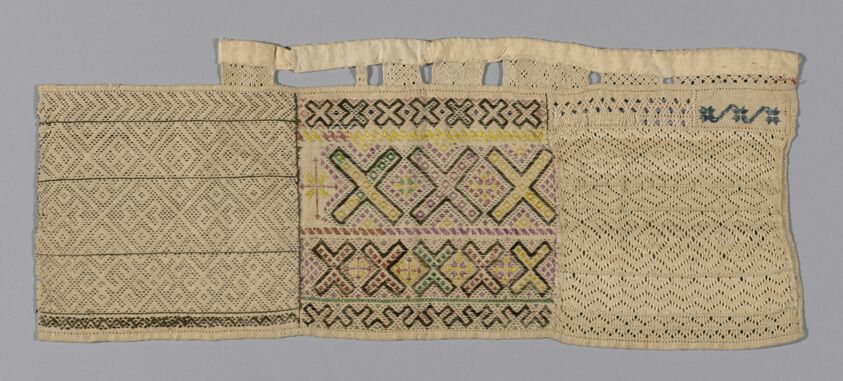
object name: Textile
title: Sampler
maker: Spain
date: 19th century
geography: Spain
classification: textile; sampler; needlework (visual works)